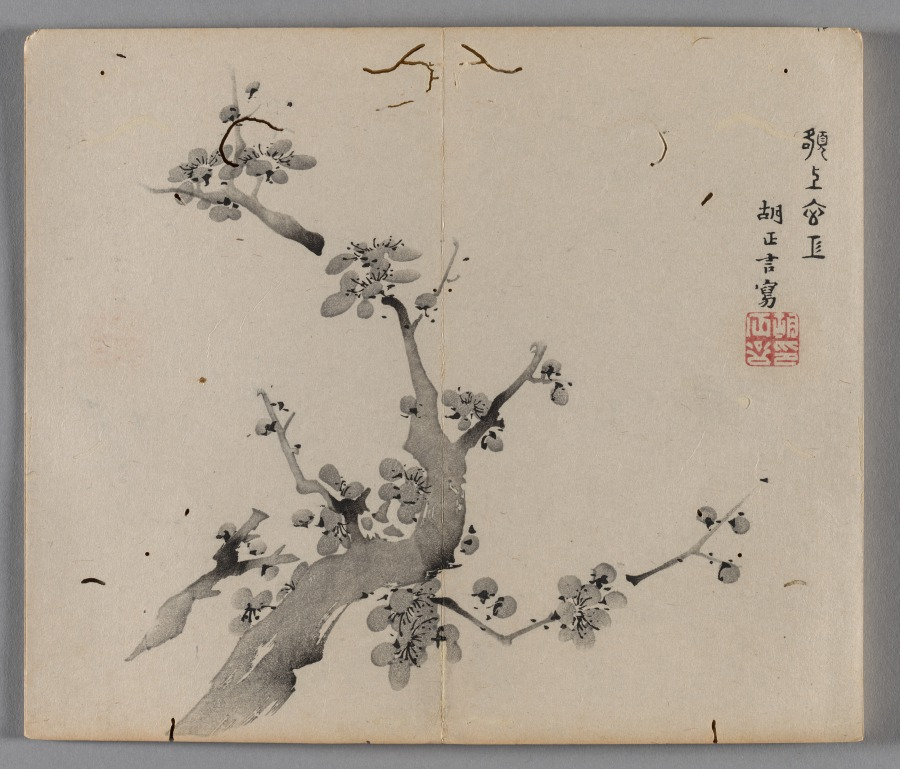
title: Ten Bamboo Studio Painting and Calligraphy Handbook (Shizhuzhai shuhua pu): Plum Blossoms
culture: China, Qing dynasty (1644-1911)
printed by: Hu Zhengyan (Chinese, c. 1584–1674)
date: 1633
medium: Woodblock-printed book; ink and colors on paper; first edition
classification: Print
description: Color printing reached a level of perfection in the early 1600s, as seen in this Ten Bamboo Studio Collection of Calligraphy and Painting and the Mustard Seed Garden Manual of Painting (printed 1679 and 1701). The painterly quality, precision in registering (aligning) the woodblocks, and harmonious colors made them the most successful color print editions in Chinese history. Both editions were printed and compiled in Nanjing, spread nationwide, and had a great impact on the arts in Japan and Korea.